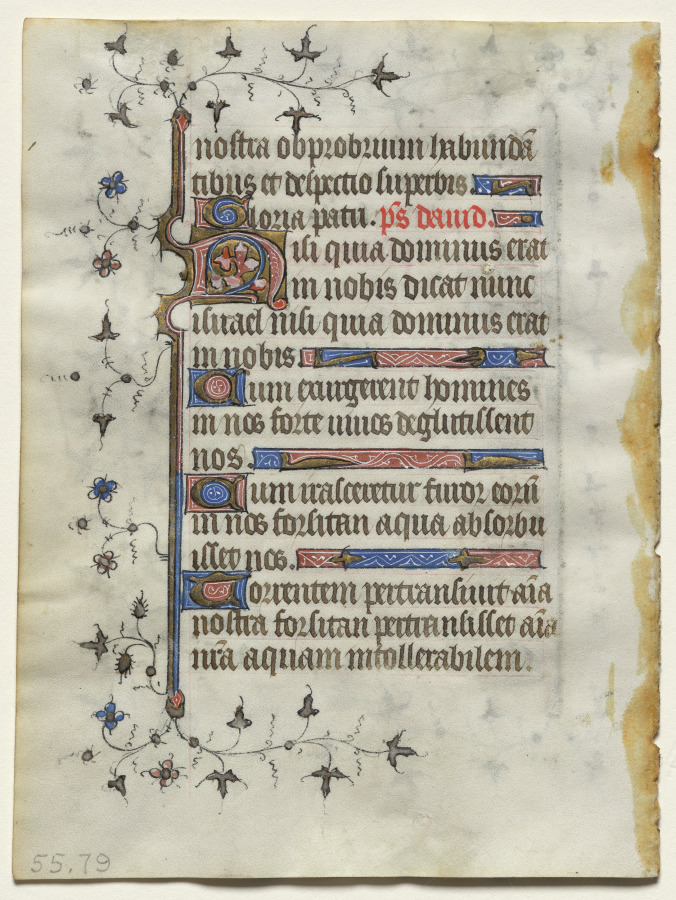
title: Bifolio from a Book of Hours: Adoration of the Magi (recto)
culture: France, Paris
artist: workshop of Boucicaut Master (French, Paris, active about 1410–25)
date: c. 1415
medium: ink, tempera, and gold on vellum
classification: Manuscript